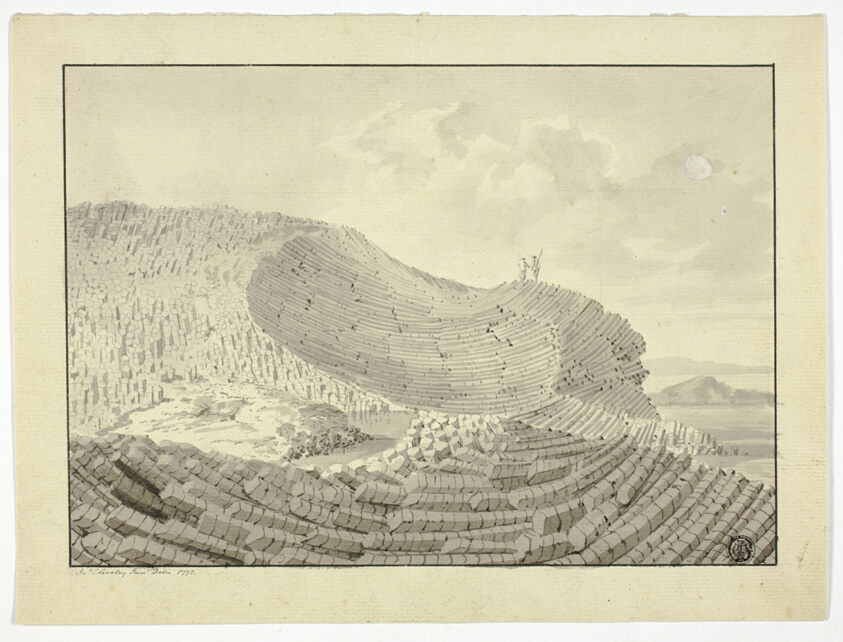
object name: Drawing and Watercolor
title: Giant's Causeway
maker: John Clevely, II (English, 1747-1786)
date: 1772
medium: Pen and black ink and brush and gray wash with black chalk, on cream laid paper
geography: England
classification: ink or chalk wash; drawings (visual works); prints and drawing